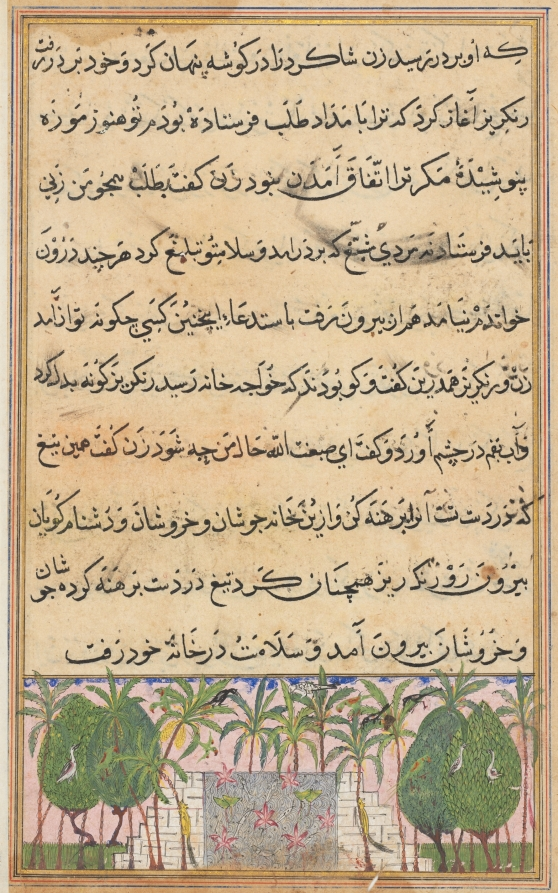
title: Landscape with a lotus pool, from a Tuti-nama (Tales of a Parrot): Eighth Night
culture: Mughal India, court of Akbar (reigned 1556–1605)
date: c. 1560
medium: gum tempera, ink, and gold on paper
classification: Painting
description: A serene, blue lotus pool is surrounded by plants and wildlife. Bright yellow squirrels climb up the thin trunks of date palms, while birds perch in the treetops. Fish swim in the stylized “basket-weave” water. This is one of only two non-narrative landscape scenes in this volume of the Tuti-nama.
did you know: The lotus pool has a long tradition in pre-Mughal painting.